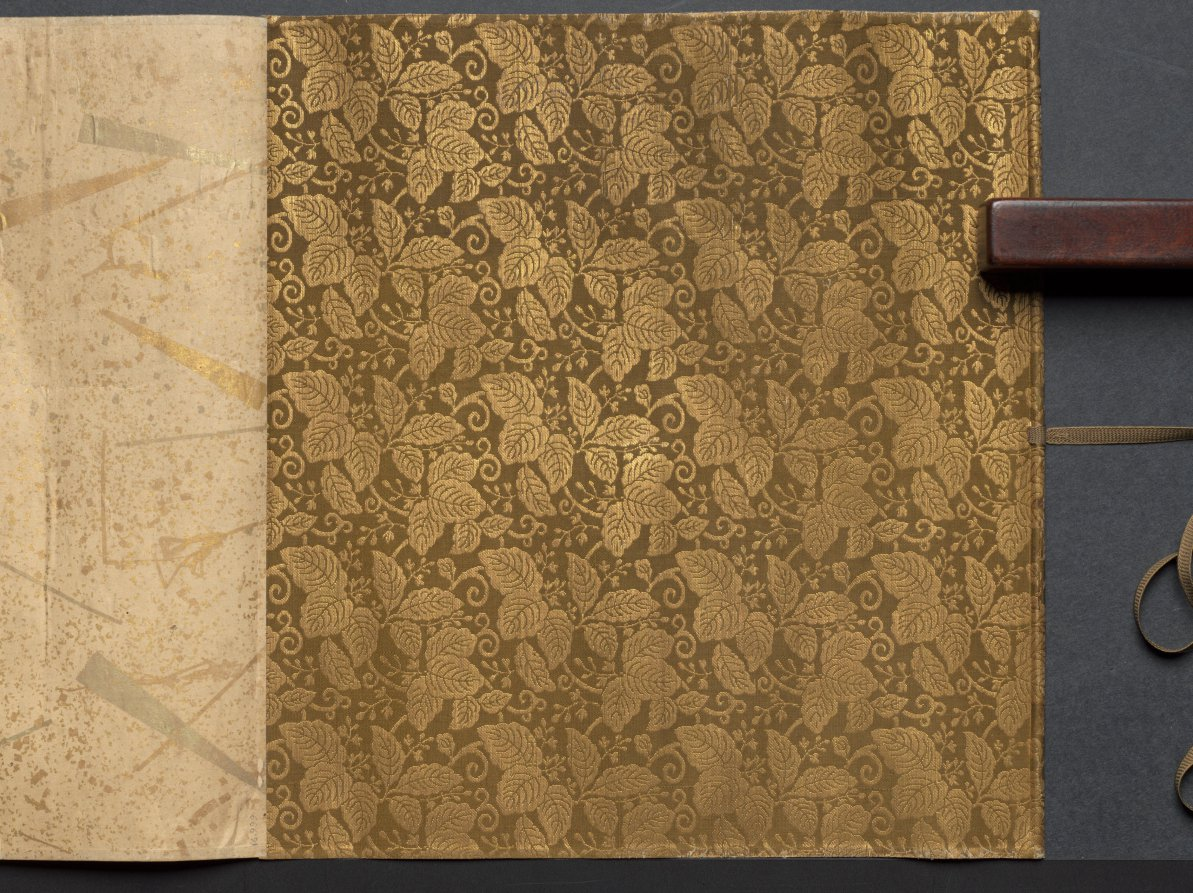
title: People Fleeing from a Fire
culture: Japan, Edo period (1615–1868)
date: 1615–1868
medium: Handscroll; color and gold on paper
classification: Painting